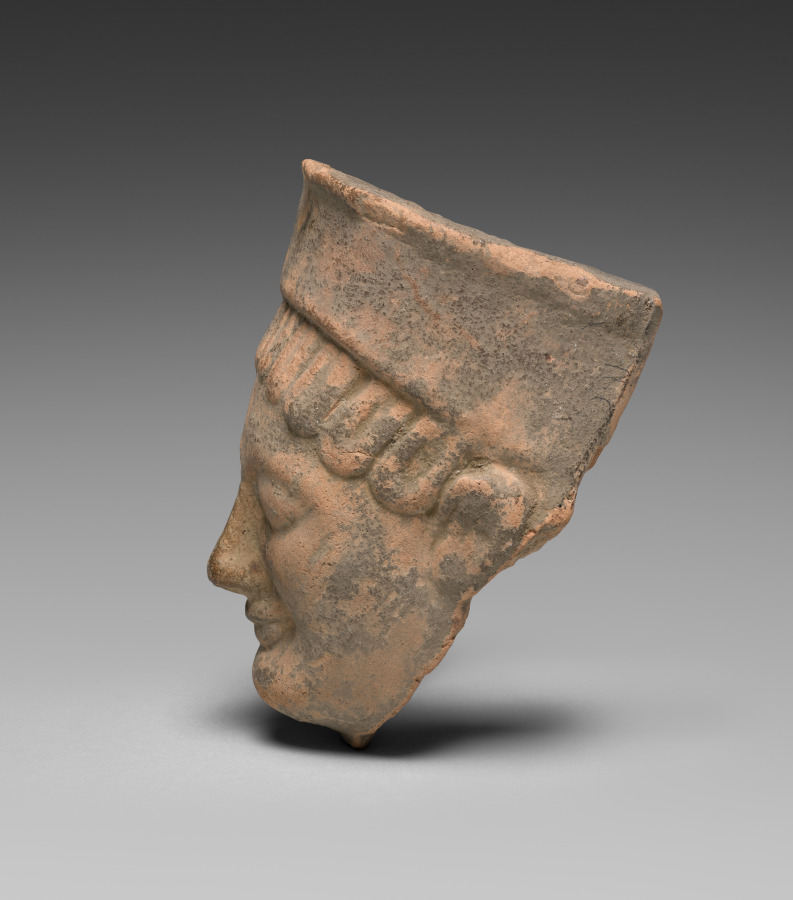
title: Mask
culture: Greece, Sicily, Selinus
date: 550 BCE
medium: terracotta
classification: Sculpture